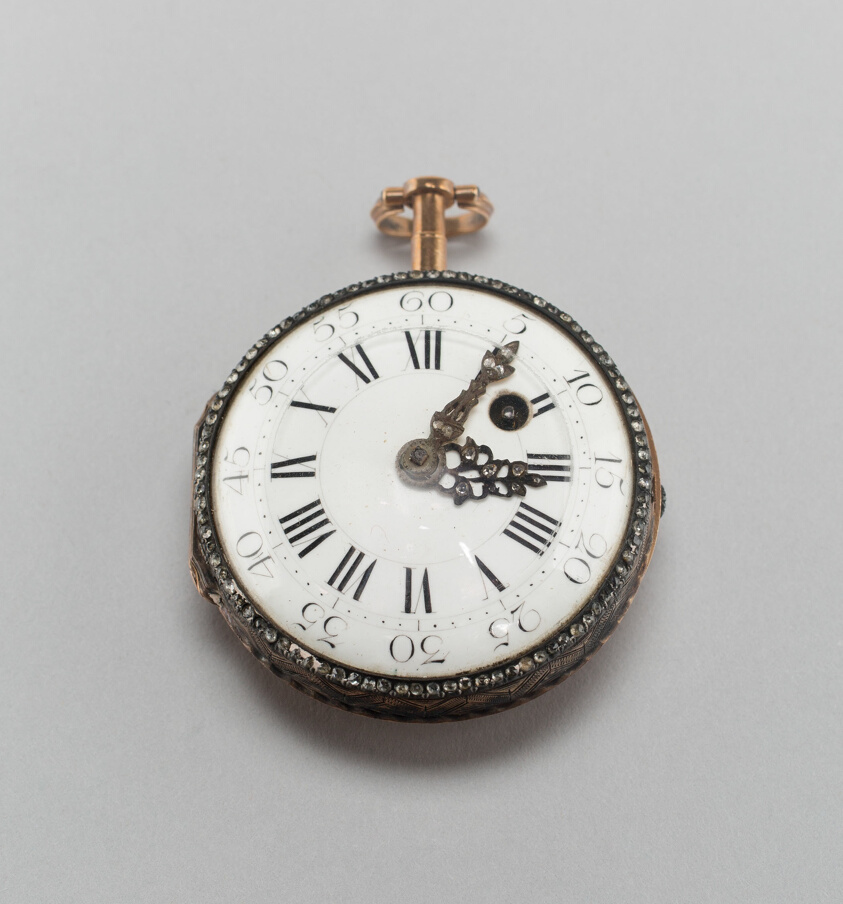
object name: Metalwork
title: Watch and Key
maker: Paris, France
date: Mid to late 18th century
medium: Gold and enamels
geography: France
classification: gold; metal; watch; european decorative arts; metalwork